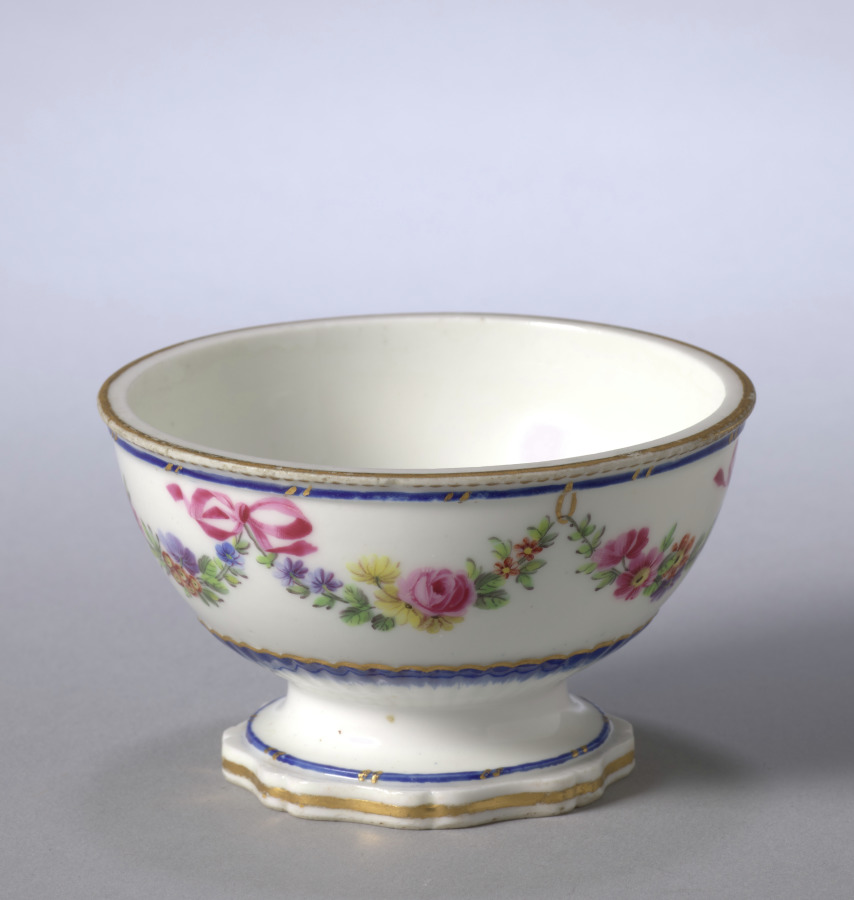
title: Soap Box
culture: France, Sèvres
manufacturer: Sèvres Porcelain Factory (French, est. 1756)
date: c. 1769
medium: soft-paste porcelain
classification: Ceramic